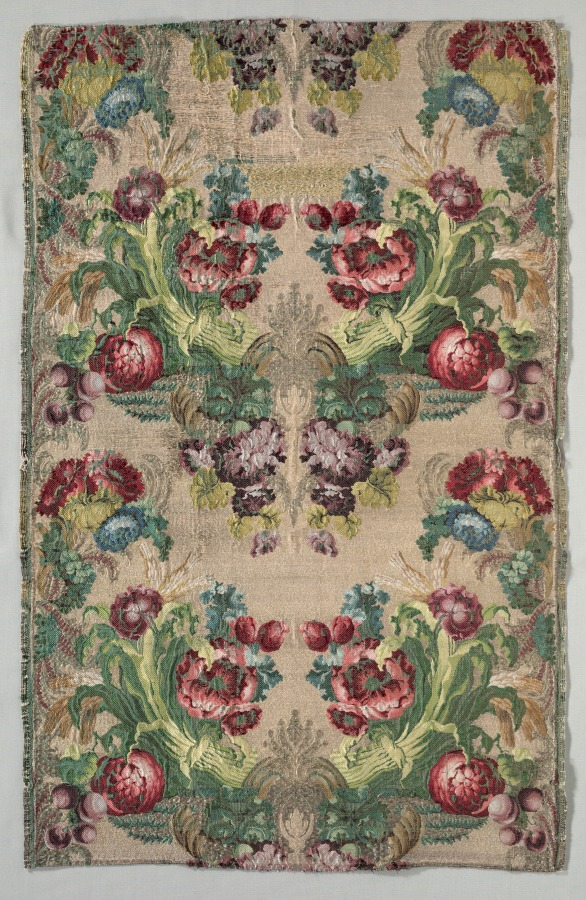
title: Lengths of Textile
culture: Italy, 18th century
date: 1700s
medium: brocade; silk and metal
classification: Textile